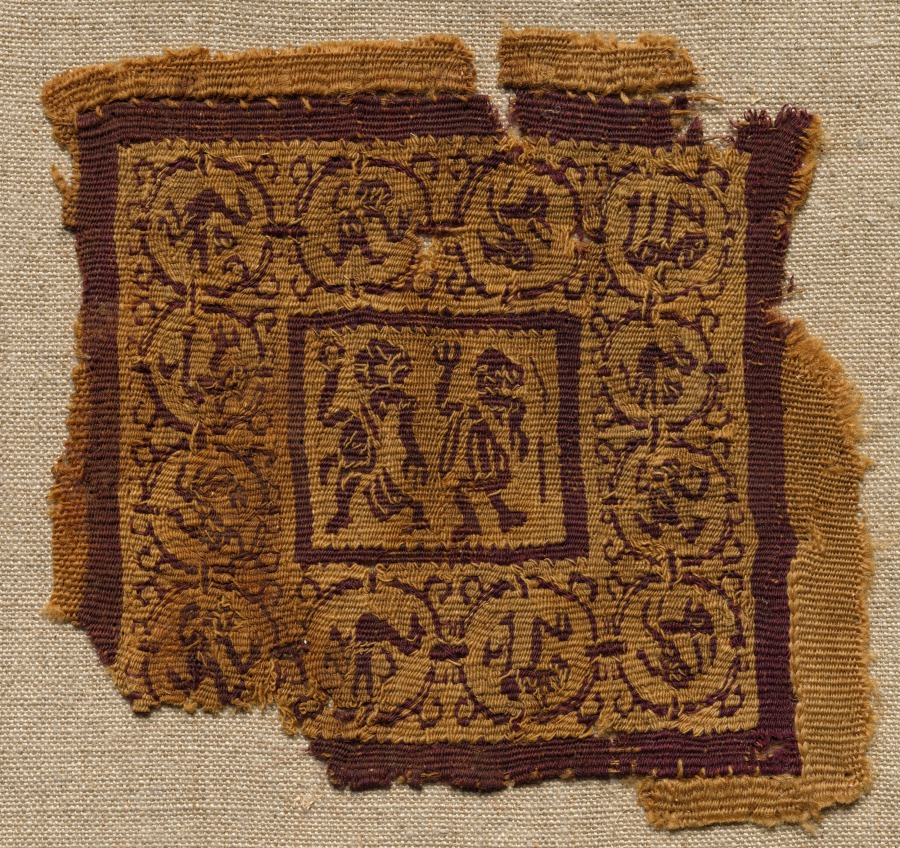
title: Fragment, with a Segmentum, from a Tunic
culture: Egypt, Byzantine period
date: early 600s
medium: tabby ground, inwoven tapestry ornament; wool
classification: Textile